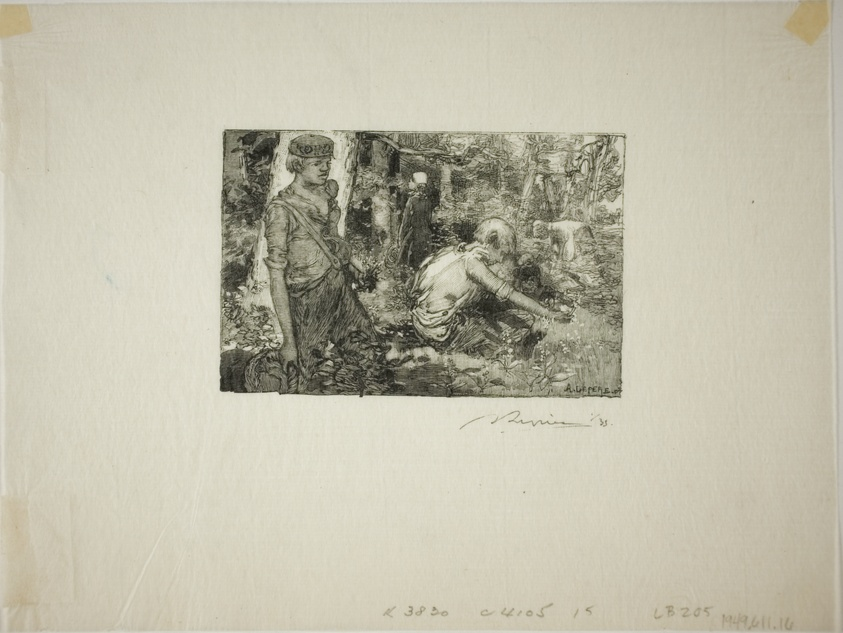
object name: Print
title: Gathering Lily-of-the-Valley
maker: Louis Auguste Lepère (French, 1849-1918); published by A. Desmoulins (French, active c. 1908-1910)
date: 1890, published 1908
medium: Wood engraving in black on cream laid Japanese paper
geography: France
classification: wood engraving; print; prints and drawing